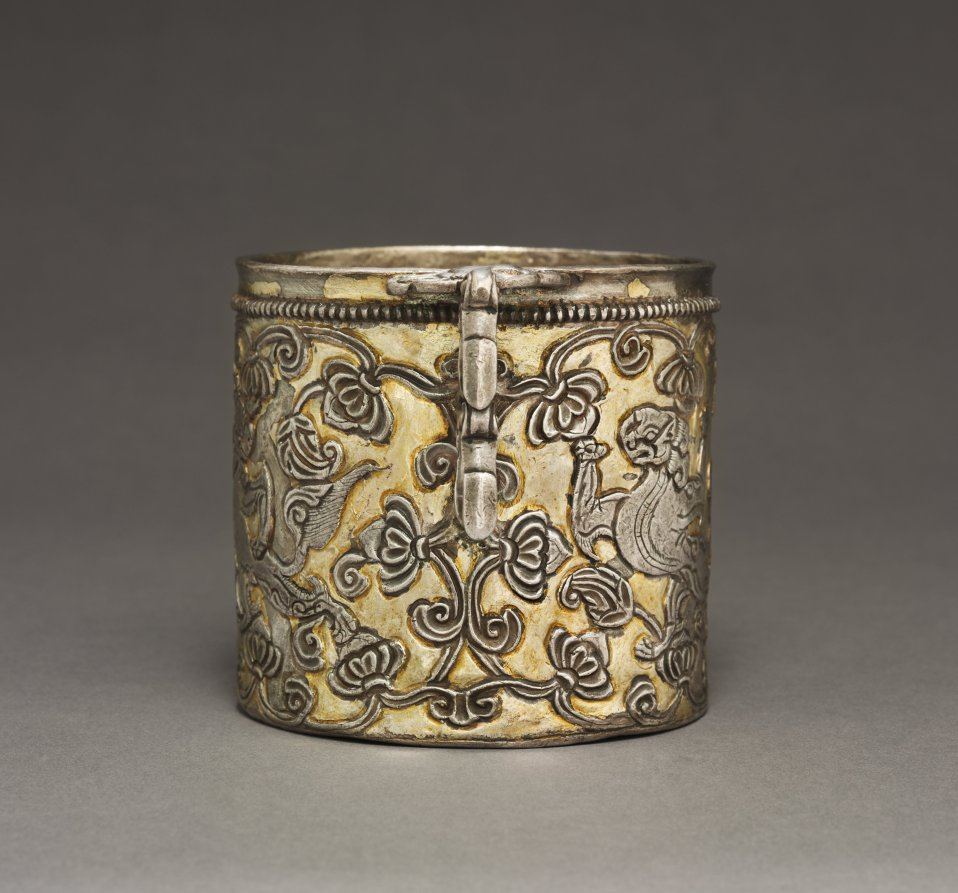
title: Beaker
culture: Central Asia (Sogdiana) or Tibet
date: c. late 600s–early 700s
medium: silver with gilding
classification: Silver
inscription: Inscribed on bottom of the cup: "Phan shing gong skyes gui sug byad (or byang)"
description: The circular shapes of the cup’s handle feature a flat edge on which the user rested their thumb for better grip, a design characteristic of silver objects made during the 700s by Sogdian artists, who traveled from Central Asia along international trade routes. An ownership inscription in Tibetan script on the underside of the cup identifies the vessel as a personal possession. The circles and lines carved below this inscription are likely measurements recording the weight of the silver used for the cup.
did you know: This cup depicts two lions and a lionlike animal with horns!